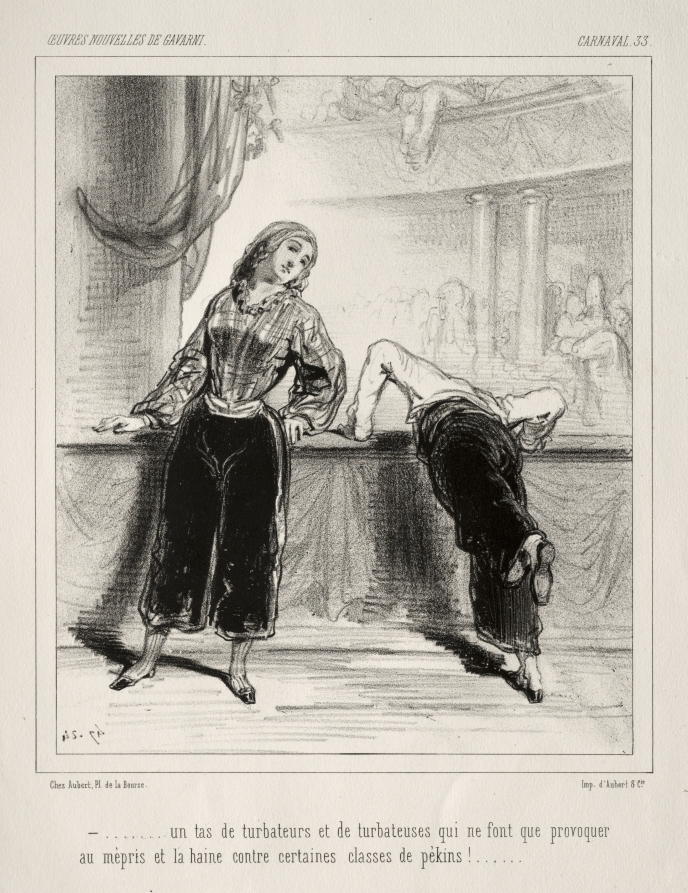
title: Carnaval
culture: France, 19th century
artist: Paul Gavarni (French, 1804–1866)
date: c. 1841–47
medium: lithograph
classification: Print